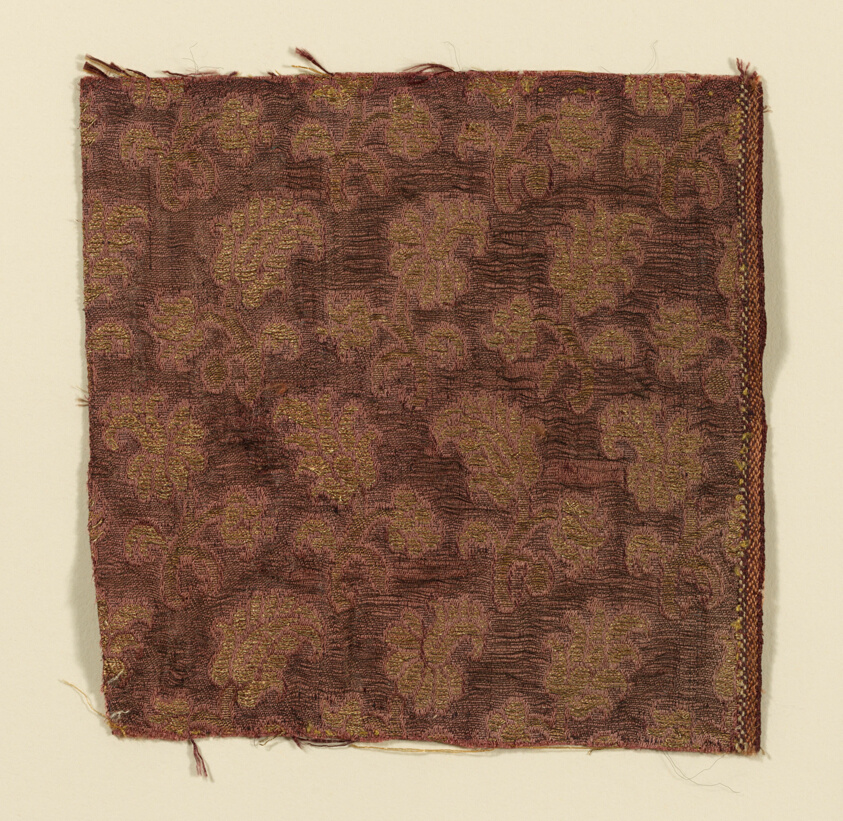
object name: Textile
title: Fragment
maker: Italy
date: 17th century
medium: brocaded silk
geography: Italy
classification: textile; weaving